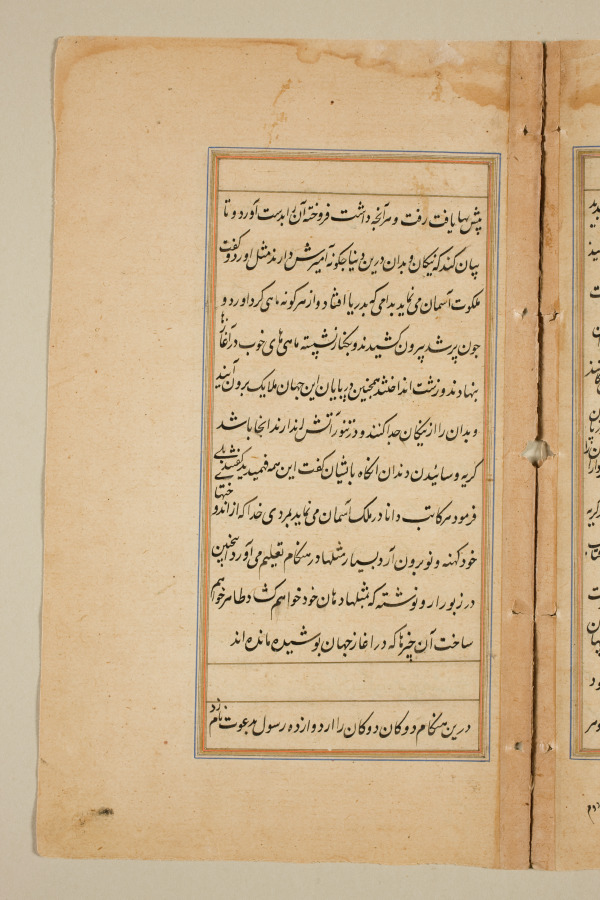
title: Text page from a Mirror of Holiness (Mir’at al-quds) of Father Jerome Xavier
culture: Mughal India, Allahabad, made for Prince Salim (1569–1627)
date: 1602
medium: Ink and gold on paper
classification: Manuscript